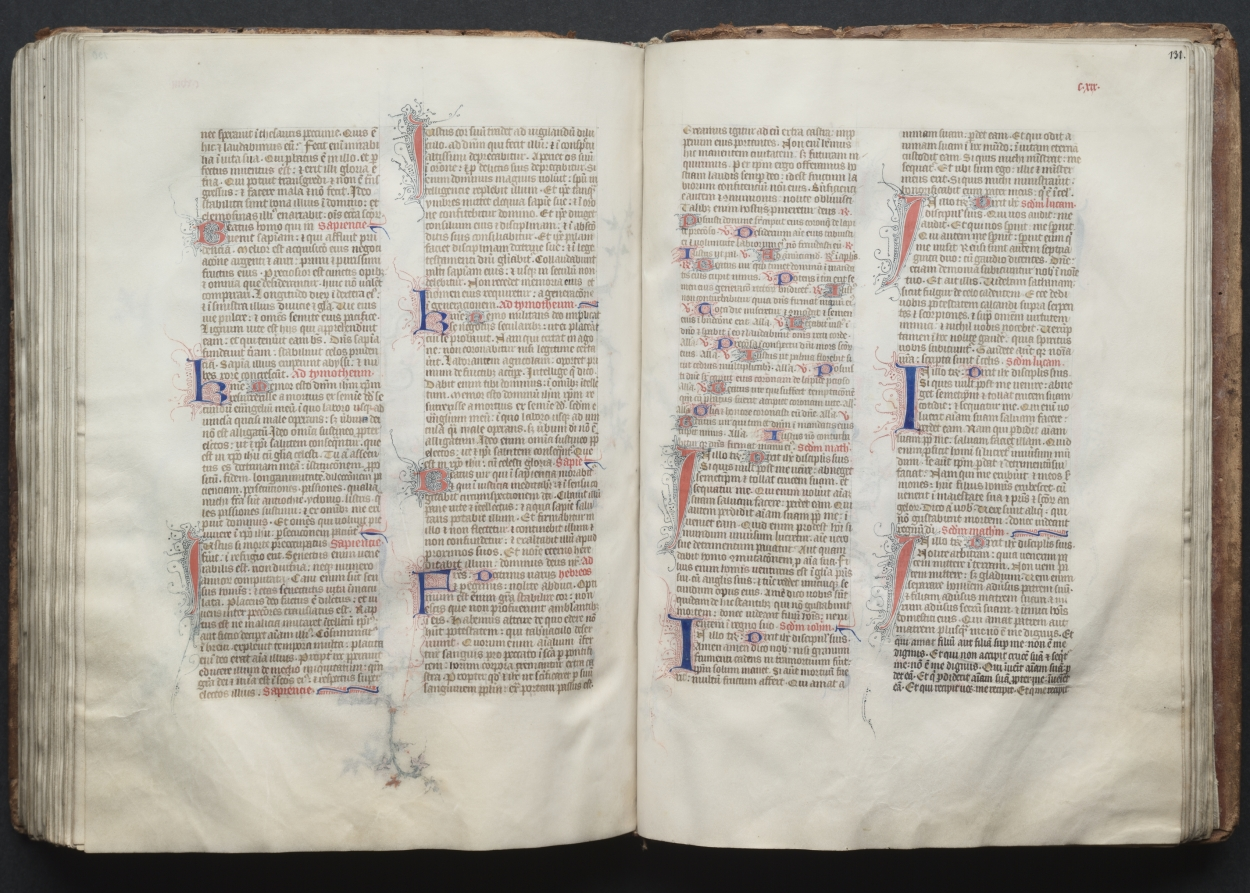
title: The Gotha Missal: Fol. 130v, Text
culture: France, Paris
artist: Master of the Boqueteaux (French)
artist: and Workshop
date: c. 1375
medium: ink, tempera, and gold on vellum; blind-tooled leather binding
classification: Bound Volume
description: The style and quality of this manuscript's decoration is typical of deluxe Parisian books made for aristocratic or royal patrons. Most of the book's decoration appears to be the work of the Master of the Boqueteaux, an artist active at the court of King Charles V (died 1380). His style was apparently shared by a number of book illuminators working in and around Paris. It is very possible that the Gotha Missal belonged to Charles V, but is not provable because the manuscript has no royal portraits and lacks a colophon. Given the book's magnificent decoration, however, it would seem that it was produced for a Valois prince, if not for the king himself. The manuscript receives its name from the German dukes of Gotha, its later owners.